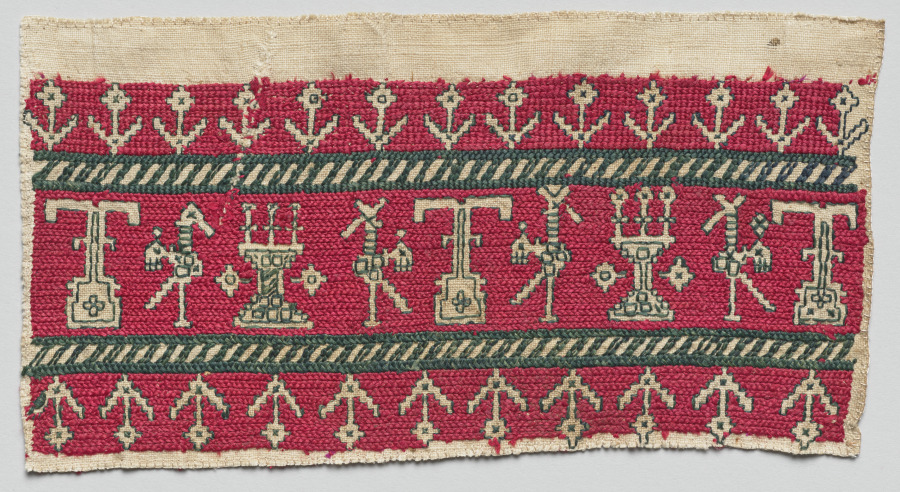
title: Fragment of a furnishing textile (one of five)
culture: Africa, North Africa, Morocco, Azemmour, Moroccan embroiderer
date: 1700s–1800s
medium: Linen, silk, dye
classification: Embroidery